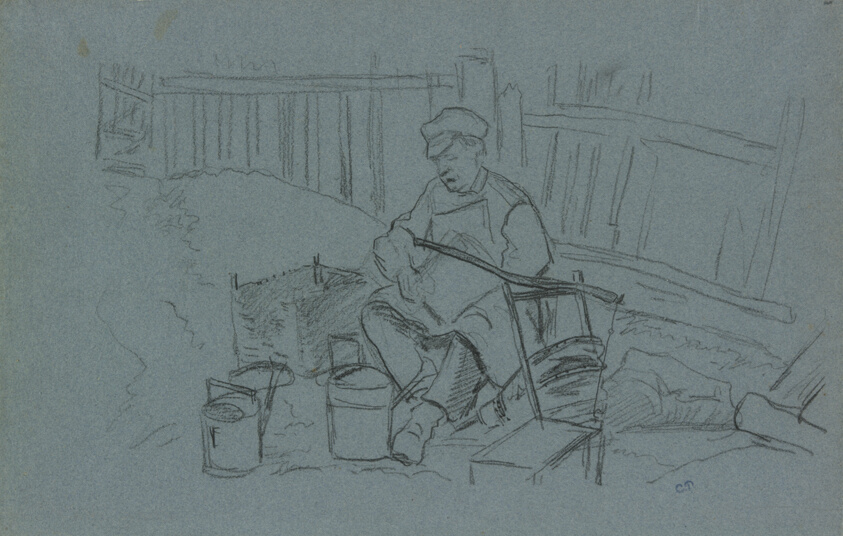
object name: Drawing and Watercolor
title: Tinker with His Tools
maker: Camille Pissarro (French, 1830-1903)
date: 1874/76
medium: Black chalk on blue laid paper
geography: France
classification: chalk; drawings (visual works); prints and drawing